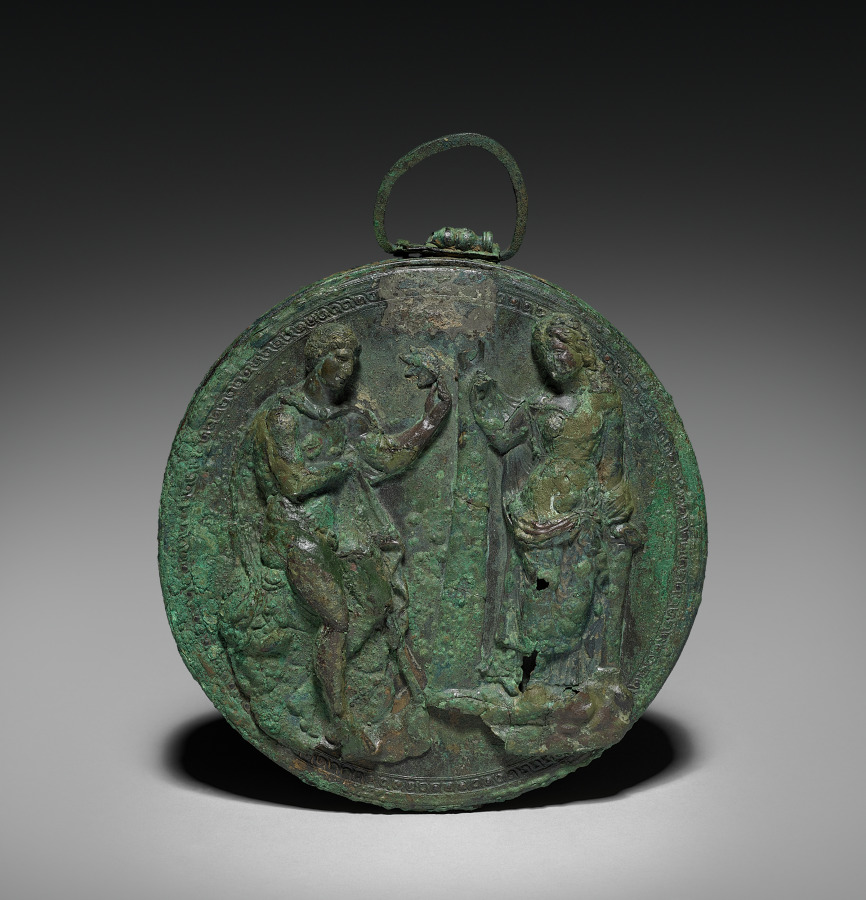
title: Mirror Case with Cover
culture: Greece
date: 300s BCE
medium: bronze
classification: Metalwork